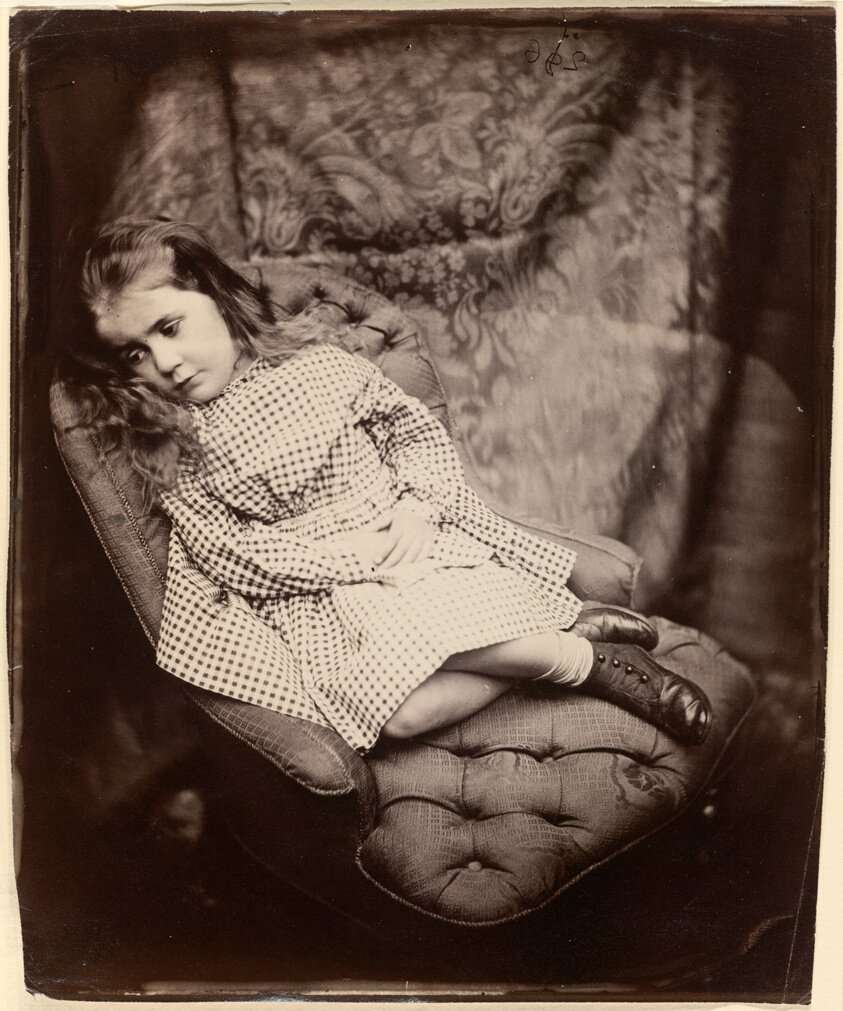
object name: Photograph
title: Margaret Frances Langton Clarke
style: 19th century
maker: Lewis Carroll (Reverend Charles Lutwidge Dodgson); English, 1832–1898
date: 1864, printed c. 1866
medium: Albumen print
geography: England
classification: albumen silver print; photographic process; photography; photograph